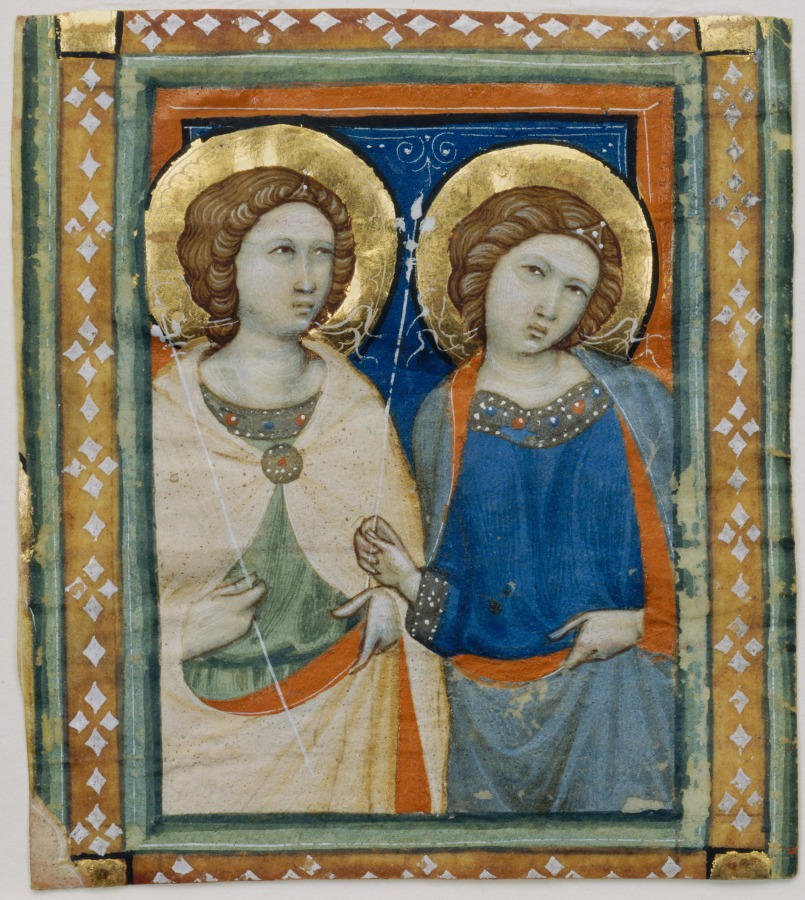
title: Illumination Excised from a Choir Book: Two Female Angels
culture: Italy, Siena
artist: Niccolo di ser Sozzo Tegliacci (Italian, Siena, active 1334–63)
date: c. 1332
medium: tempera and gold on parchment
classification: Manuscript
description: This miniature was taken from a choir book and shows two female figures. Their golden halos mark them as saints and the lily scepters as virgins. It is attributed to the Sienese painter Niccolò di ser Sozzo. Although more than half of the population of Siena is said to have died of the plague, the city’s finances recovered quickly. In the arts, however, there is a continuation of the traditions of the first half of the century, of which Niccolò is a characteristic representative. It is therefore often difficult to decide whether a work was created before or after the plague wave.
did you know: Niccolo di ser Sozzo Tegliacci was one of the leading panel painters and miniaturists working in Siena. His father is believed to have also been an illuminator although he was a little known.